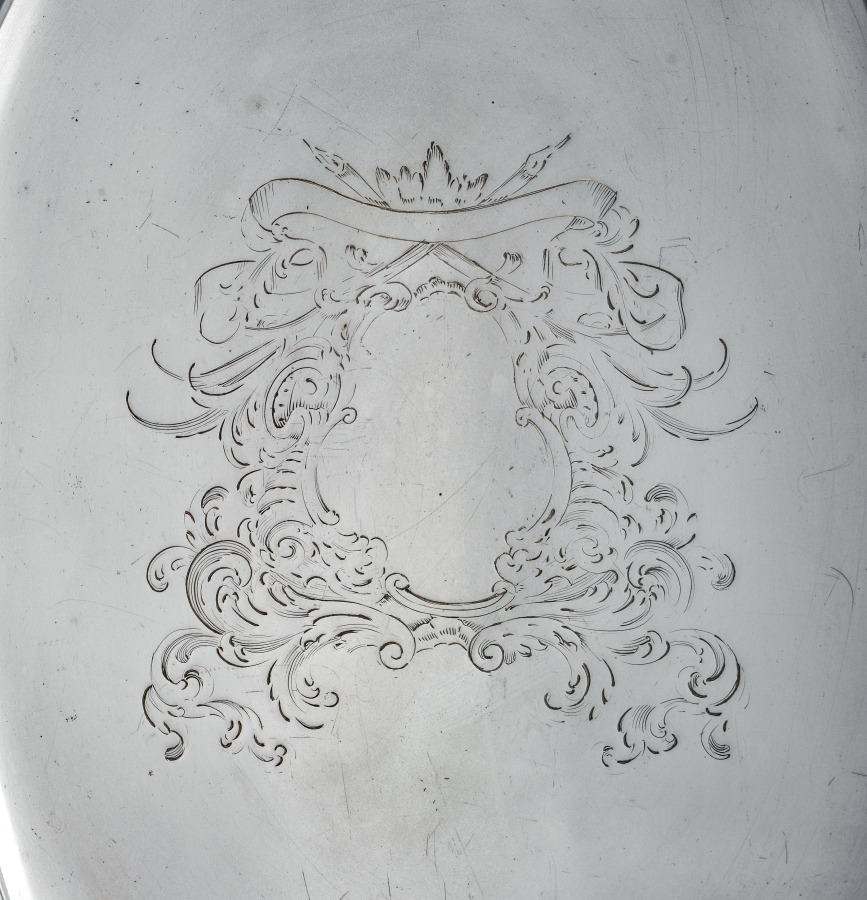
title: Cake Basket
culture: Britain, London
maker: Samuel Herbert and Company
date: 1753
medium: Silver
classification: Silver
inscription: “H/I I”; hallmark for London, George II, Samuel Herbert and Henry Bailey, and date 1753.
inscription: “To/H.H.M./from/S.K., E.W.G., J.H.J., D.R.L., M.B.R./on the occasion of his/Silver Wedding/1911-1936”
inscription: “50-2”; hallmark for London, George II, Samuel Herbert and Henry Bailey, and date 1753.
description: Drinking tea at the end of the day, accompanied by sweet cakes and savory delights, became an established ritual in Britain at all levels of society during the 1700s. In grand houses, silver teapots, caddies, and cake baskets elevated this afternoon refreshment to a formal gathering.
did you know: Sheaves of wheat adorning the rim of this basket allude to the flour used in pastries and cakes for tea.